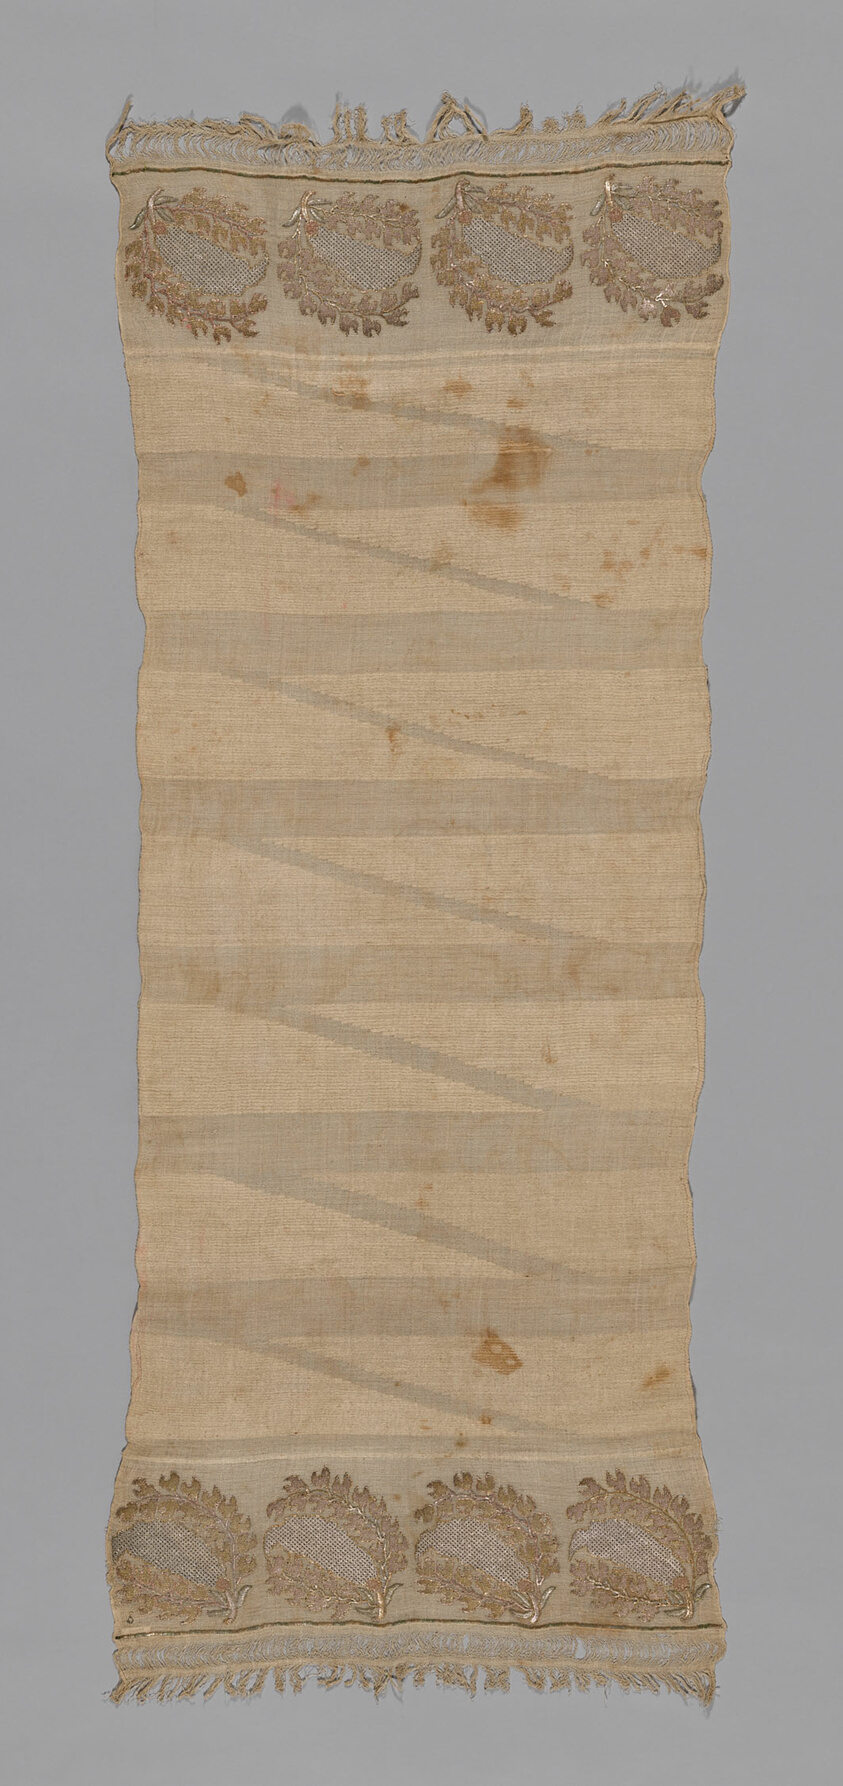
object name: Textile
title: Towel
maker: Turkey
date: 19th century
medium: embroidered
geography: Turkey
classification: textile; needlework (visual works); weaving